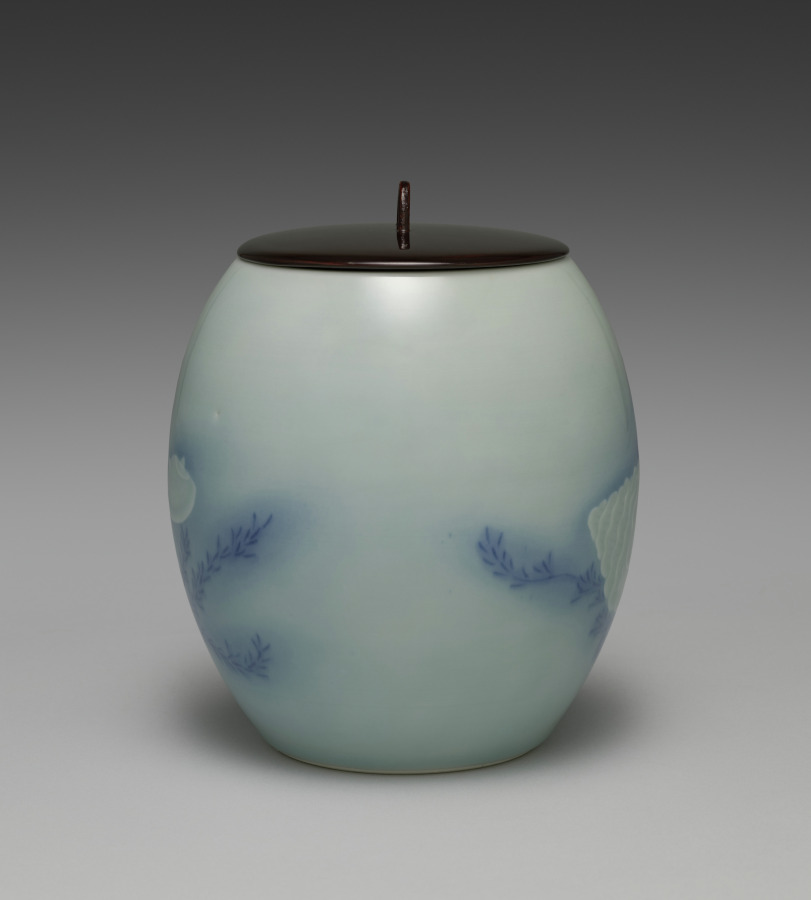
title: Water Container with Shell and Seaweed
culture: Japan, Meiji period (1868–1912) or Taishō period (1912–26)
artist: Seifū Yohei IV (Japanese, 1872–1951)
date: 1914–46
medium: Porcelain with underglaze blue, blue glaze and molded design and lacquered wood lid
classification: Ceramic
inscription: 清風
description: Yohei IV chose an aquatic theme for this mizusashi. He applied clay to the surface and molded the shape of a large conch on one side and, on the other, a clam and a scallop. The finer details he incised into the surface of his low-relief shapes. He then painted seaweed as though it were coming out from behind the sea creatures, and he further set off the animals using a masking technique with a gradated blue surround. Finally, he applied a translucent blue glaze, identified on the box as mizusai, over the entire body of the vessel. The resulting effect is that one imagines having descended through the water to the ocean floor.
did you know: A mizusashi, water container, is an essential utensil for a tea ceremony.